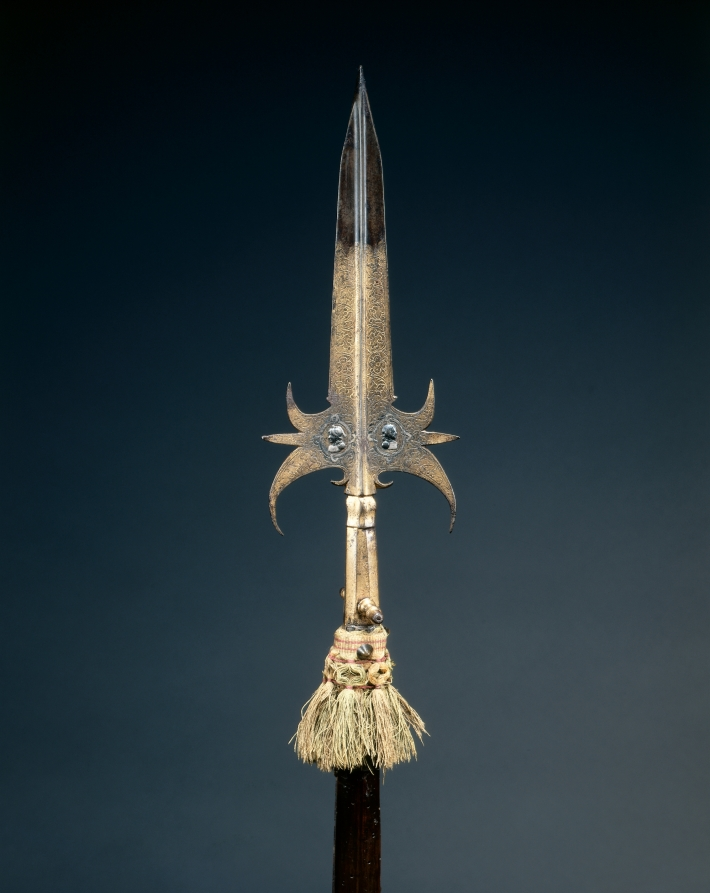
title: Partisan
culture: France, 17th century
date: 1600s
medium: steel, gilt, etched and chiselled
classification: Arms and Armor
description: The partisan, a staff weapon with a symmetrical head, was carried by infantry officers and members of princely bodyguards during the 1600s and 1700s. The large flat surface of the partisan was perfect for displaying coats of arms and with the addition of colorful velvet tassels, was a favored weapon of palace guards who would be splendidly outfitted.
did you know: A partisan is a type of polearm that consisted of a spearhead mounted on a long shaft, usually wooden, with protrusions on the sides which aided in parrying sword thrusts.